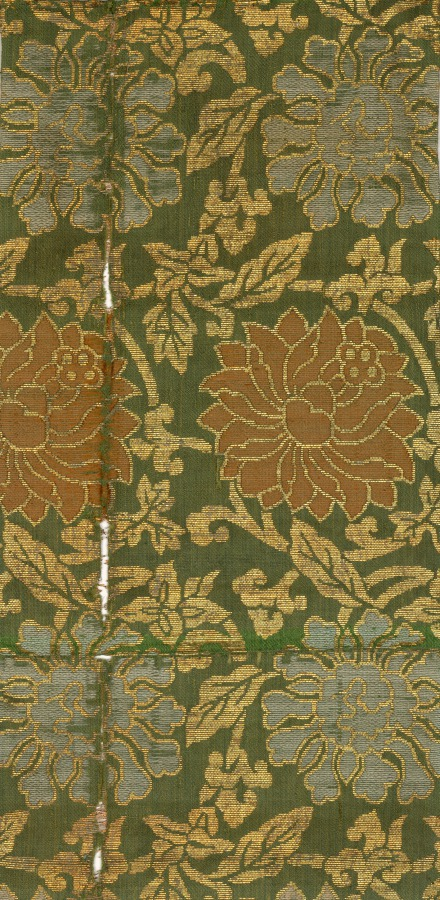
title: Textile Fragment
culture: Japan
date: 1800s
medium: silk, metallic thread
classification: Textile